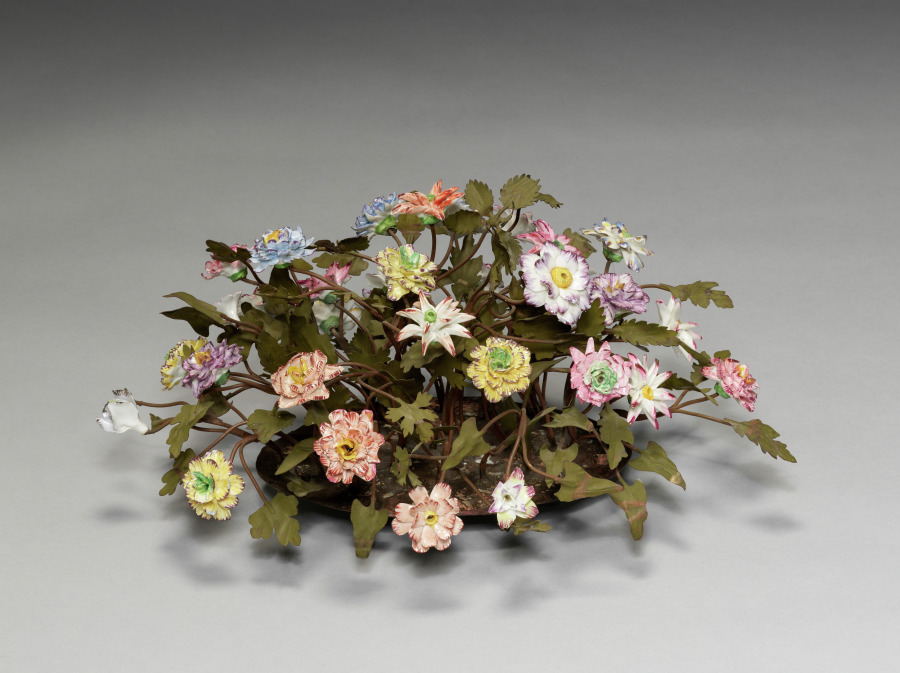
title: Centerpiece, or Jardinière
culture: France, Paris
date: c. 1830–1850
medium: gilt bronze with enamel flowers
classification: Metalwork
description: Regrettably, a maker's mark does not appear on this piece: thus the factory that made it remains unknown. Nevertheless, its design, castings, and gilding are of fine quality and indicate that it is the product of a group of talented craftsmen who worked in the robust taste of the second quarter of the 19th century.